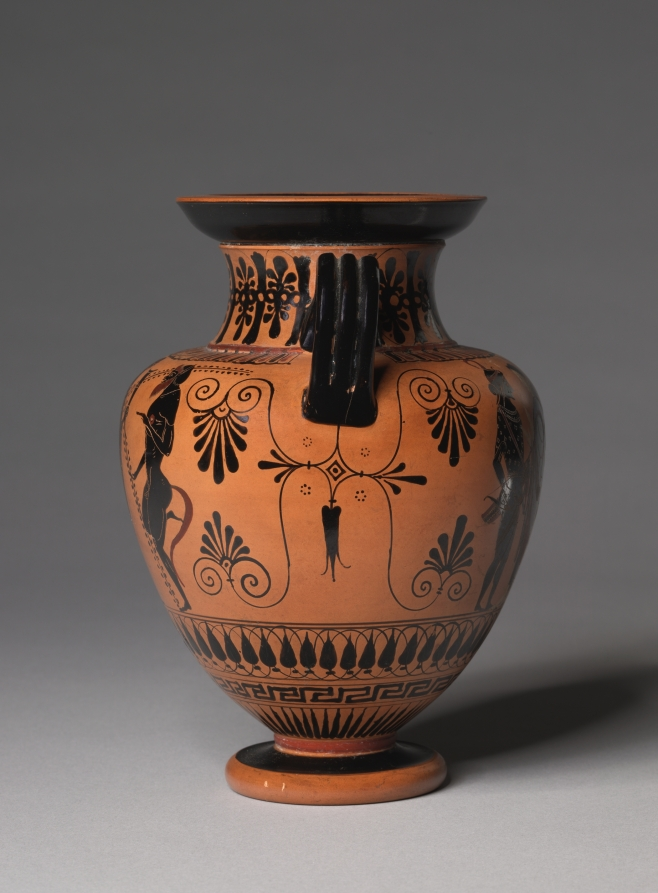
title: Black-Figure Neck-Amphora (Storage Vessel): Departing Warriors (A); Dionysos and Satyrs (B)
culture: Greek, Attic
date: c. 520–510 BCE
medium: ceramic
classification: Ceramic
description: Small in scale but finely painted and well preserved, this amphora depicts two common but unrelated subjects: the departure of warriors (side A) and Dionysos and two satyrs (side B). The warriors include an archer, identified by his bow and quiver full of arrows, and a heavily armed foot-soldier, wearing helmet and greaves and holding a spear and shield emblazoned with a horse protome. The archer faces a woman, while the warrior stands between two men.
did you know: A neck-amphora is a type of amphora with separately constructed neck and body.